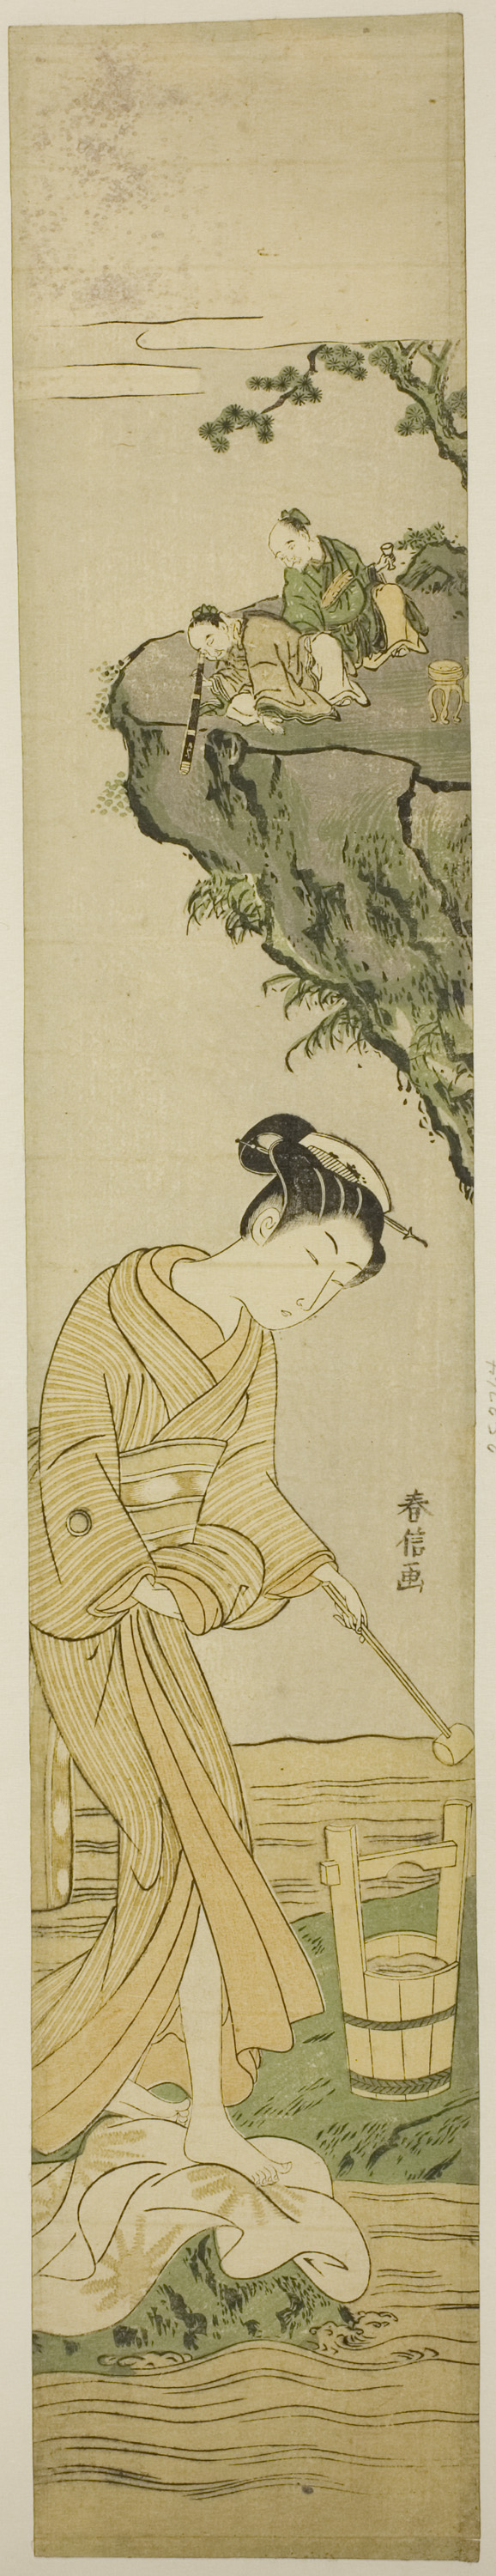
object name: Print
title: Daoist Immortals Spying on a Young Beauty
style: Japanese (culture or style)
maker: Suzuki Harunobu 鈴木 春信; Japanese, 1725 (?)-1770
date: c. 1768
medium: Color woodblock print; hashira-e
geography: Japan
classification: woodblock print; print; asian art